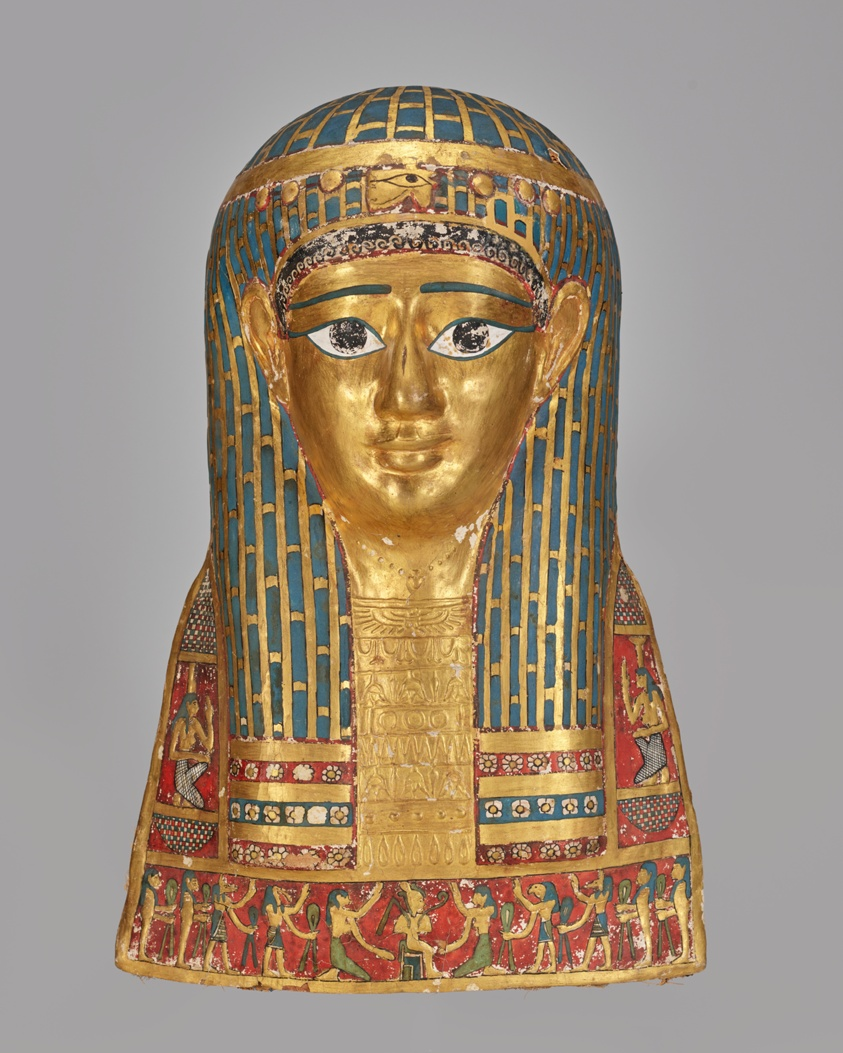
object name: Funerary Object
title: Funerary Mask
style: roman period (egyptian), greco-roman (egyptian), ancient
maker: Egyptian; probably from Hawara, Egypt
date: Late Ptolemaic Period-early Roman Period, 1st century BCE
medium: Cartonnage, gold leaf, and pigment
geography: Egypt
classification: mummy goods; mummy masks; ancient art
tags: funerary art, faces, goddesses, gods (deities), mummies